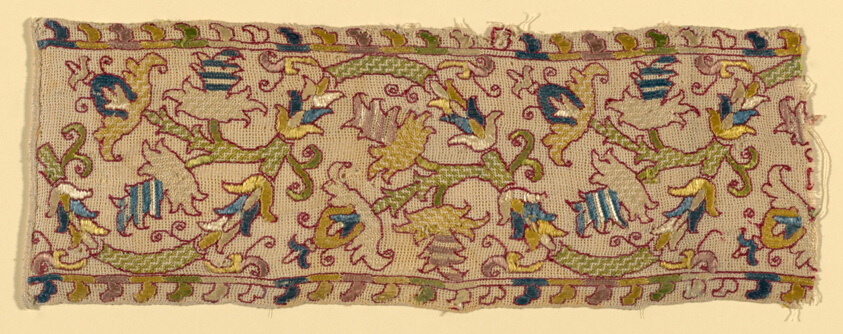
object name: Textile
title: Border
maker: Italy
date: 17th century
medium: Linen, plain gauze weave; embroidered with silk floss in running, double running and satin stitches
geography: Italy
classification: textile; needlework (visual works)